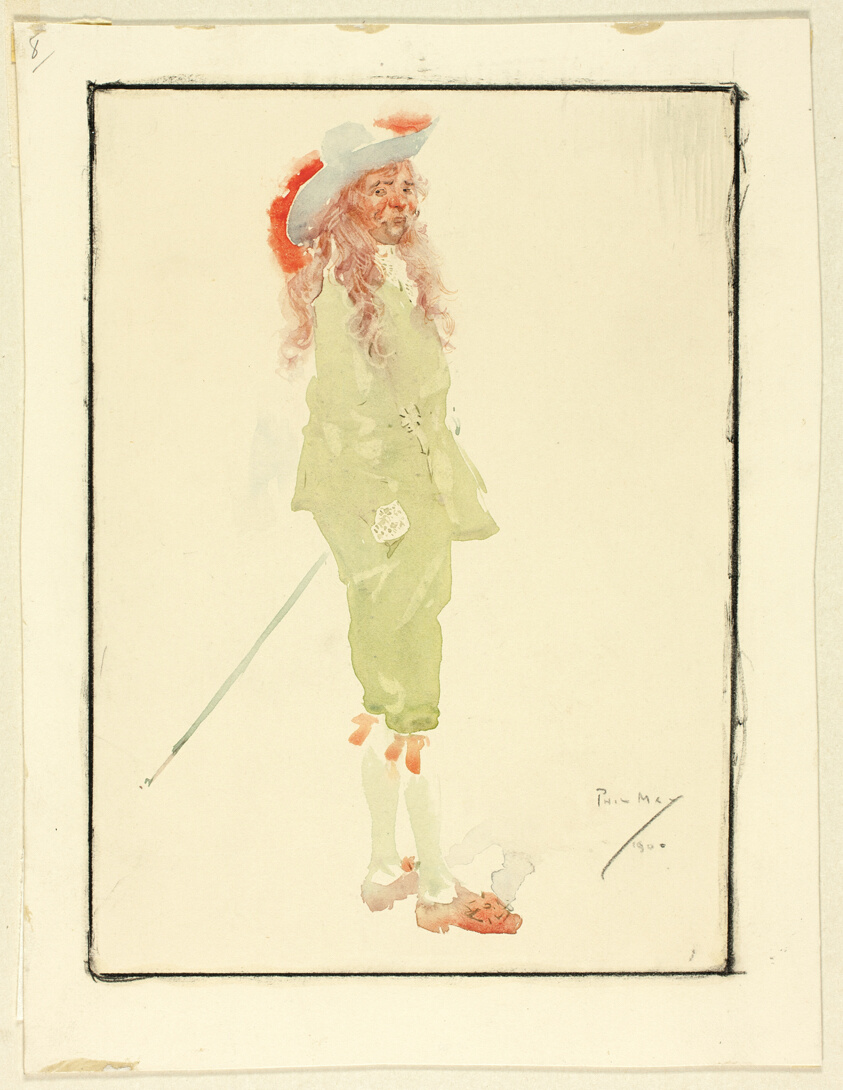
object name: Drawing and Watercolor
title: A Cavalier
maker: Philipp William May; English, 1864-1903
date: 1900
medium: Watercolor on cream wove board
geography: England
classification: watercolor; drawings (visual works); prints and drawing